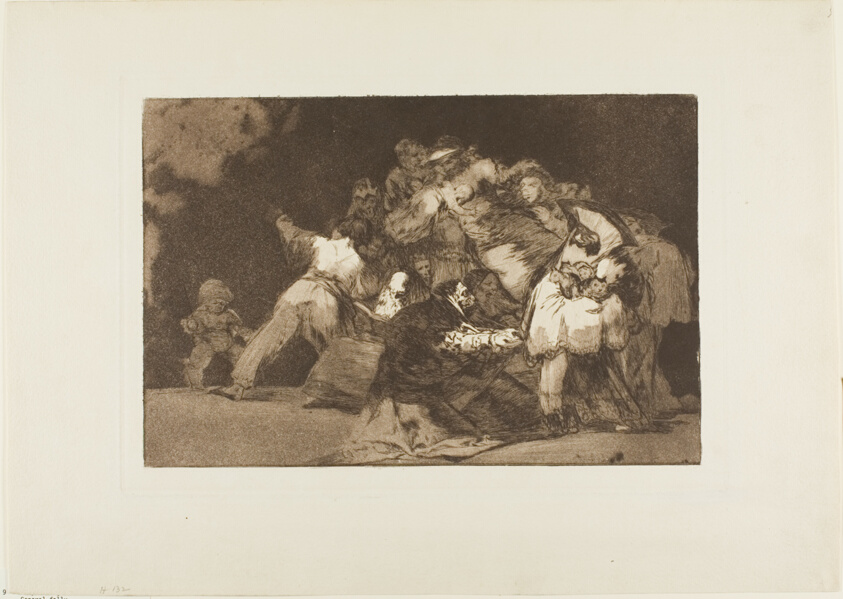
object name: Print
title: The Claws of a Cat and the Dress of a Devotee - similar to Vice is often clothed in Virtue's habit, plate nine from Los Proverbios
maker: Francisco José de Goya y Lucientes (Spanish, 1746-1828)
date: 1815/24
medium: Etching and burnished aquatint printed in sepia ink on ivory wove paper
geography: Spain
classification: etching; print; prints and drawing